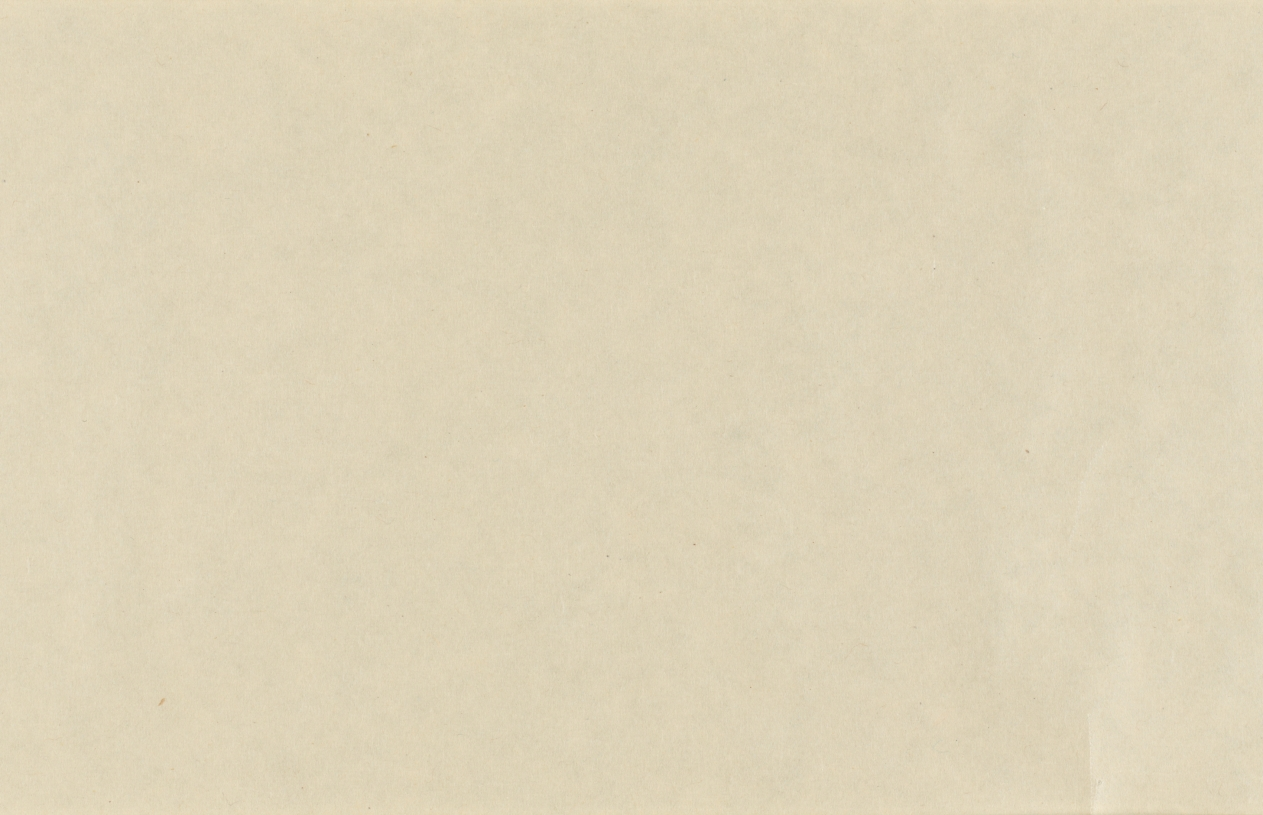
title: Eight Views of Xiao-Xiang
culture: Japan, Muromachi period (1392–1573)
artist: Sesson Shūkei (Japanese, c. 1492–c. 1577)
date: 1500s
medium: handscroll; ink on paper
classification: Painting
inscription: Signature and seal of artist at end of painting.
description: Eight Views of the Xiao and Xiang Rivers can be traced to 11th-century Chinese poems and paintings, the depiction of which had also become popular among Korean and Japanese painters. Xiao-Xiang refers to the region in present-day Hunan province where the Xiao and Xiang rivers converge. Few painters of the Eight Views had in fact seen the scenery; rather, they were trying to portray in ink and wash the lyrical qualities of dim light and a misty atmosphere typical of that region. Each of the poetic titles suggests a time of day, a season, or specific atmospheric conditions—subjects that challenged the abilities of the most talented artists. In this miniature painting (shukuzu) of the Muromachi period, Japanese Zen monk and painter Shukei Sesson depicted all eight views featured in Chinese prototypes: Wild Geese Descending to Sandbar; Returning Sails Off a Distant Coast; Mountain Market in Clearing Mist; River and Sky in Evening Snow; Autumn Moon over Dongting Lake; Night Rain on the Xiao and Xiang; Evening Bell from Mist-Shrouded Temple; and Fishing Village in Evening Glow.